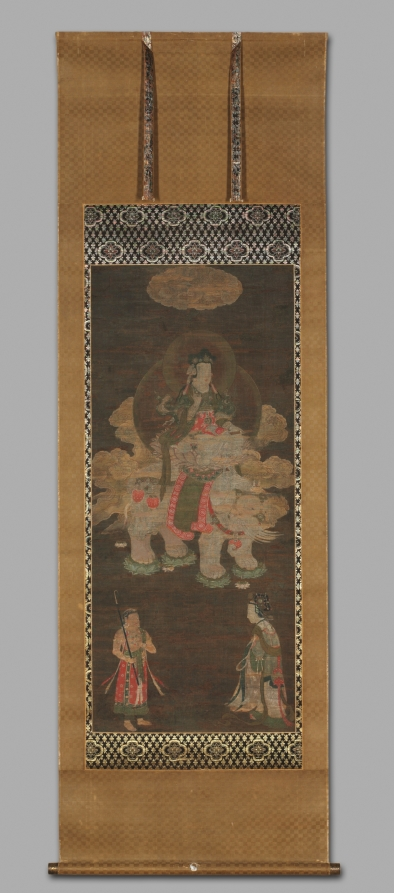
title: Shakyamuni Triad: Buddha Attended by Manjushri and Samantabhadra (Bodhisattva with Elephant)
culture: China, Fuzhou, Fujian Province, Yuan dynasty (1271-1368)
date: late 1300s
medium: Hanging scroll; ink and color on silk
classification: Painting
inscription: Inscription at the bottom of the central scroll reads: "Da Song Fuzhou fu…(Fuzhou prefecture of the great Song)."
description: This triptych is a rare example of Yuan Buddhist painting. It depicts the historic Buddha Shakyamuni flanked by two attending bodhisattvas, Manjushri (the bodhisattva of wisdom, riding a lion) and Samantabhadra (the bodhisattva of universal virtue, riding an elephant). Below them are others seeking enlightenment: two disciples of the Buddha (Ananada and Kasyapa), two non-Chinese people, a boy with topknots, and a female worshiper. The clouds above and around the divine beings form one scene that illustrates Shakyamuni’s sermon from the Lotus Sutra. This text became an important basis for Buddhist faith throughout East Asia and was central to the Mahayana school of Buddhism.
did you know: Samantabhadra, the bodhisattva of universal virtue, is mounted on a six-tusked white elephant standing on lotus flowers.